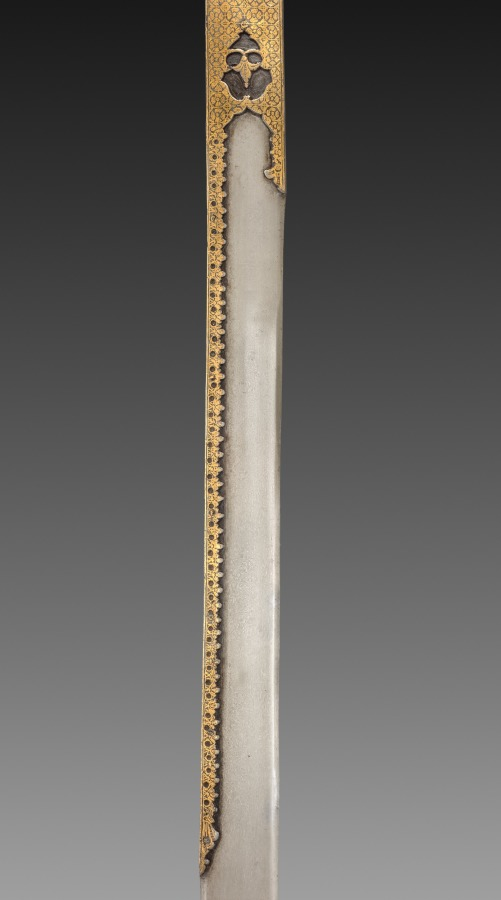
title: Sword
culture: India, perhaps Deccan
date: 1700s–1800s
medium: Watered steel blade with iron hilt inlaid with gold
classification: Arms and Armor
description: Straight swords were typical of those used among military and aristocratic circles in the southern regions of the Deccan, in contrast to the curved swords favored by Central Asian equestrians. Increased contact between the Mughal north and the Deccan south during the 1600s led to the appearance of the Deccan-style sword in courtly portraits made during the time of Jahangir and Shah Jahan, and later.